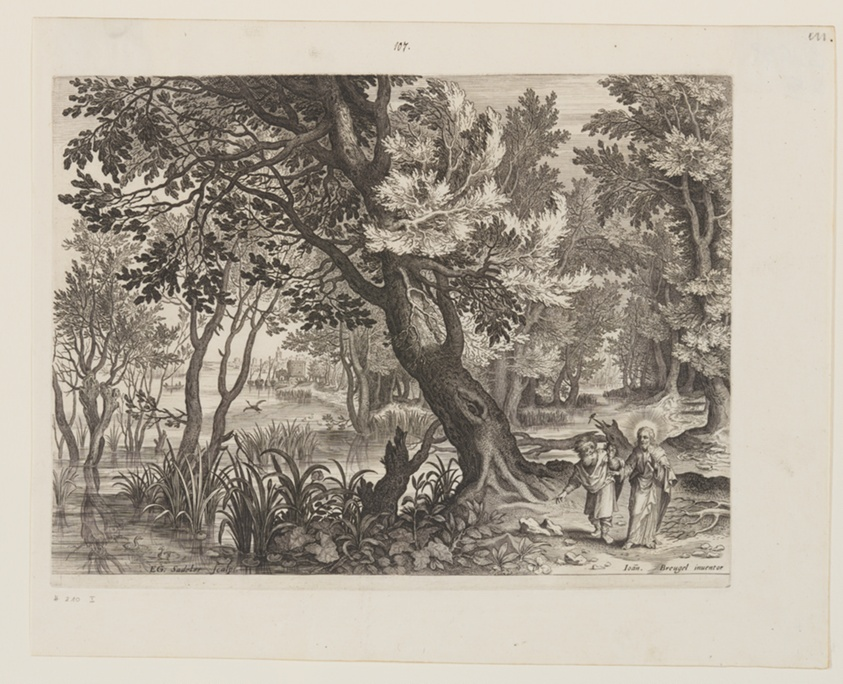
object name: Print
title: Riverscape with The Temptation of Christ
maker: Aegidius Sadeler II (Flemish, c. 1570–1629); after Jan Brueghel the Elder (Flemish, 1568–1625)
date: c. 1590-1620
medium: Engraving on ivory laid paper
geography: Flanders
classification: print; paper; prints and drawing; engraving